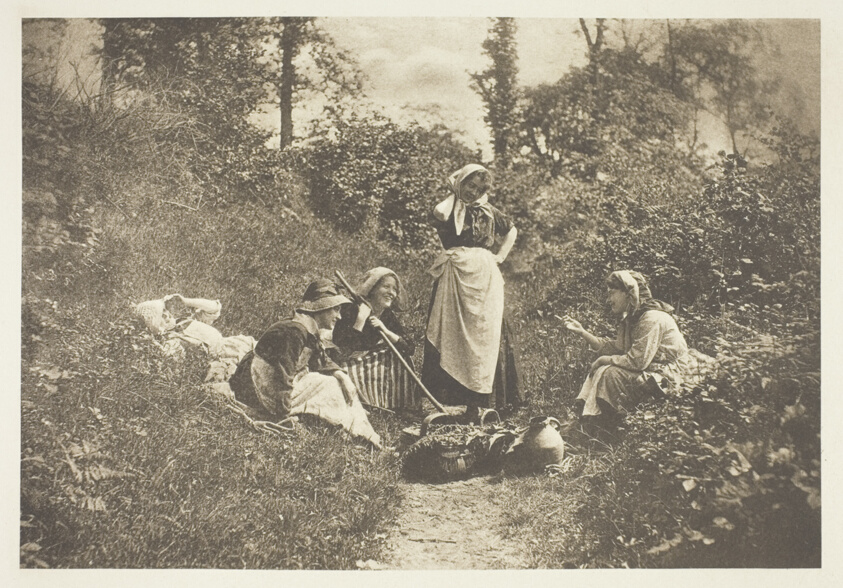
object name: Photograph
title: A Merry Tale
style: Pictorialism, 19th century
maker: Henry Peach Robinson (English, 1830–1901)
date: 1882, printed January 1890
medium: Photogravure, from "Sun Artists, Number 2" (1890)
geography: England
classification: photogravure; photomechanical process; photography; photograph